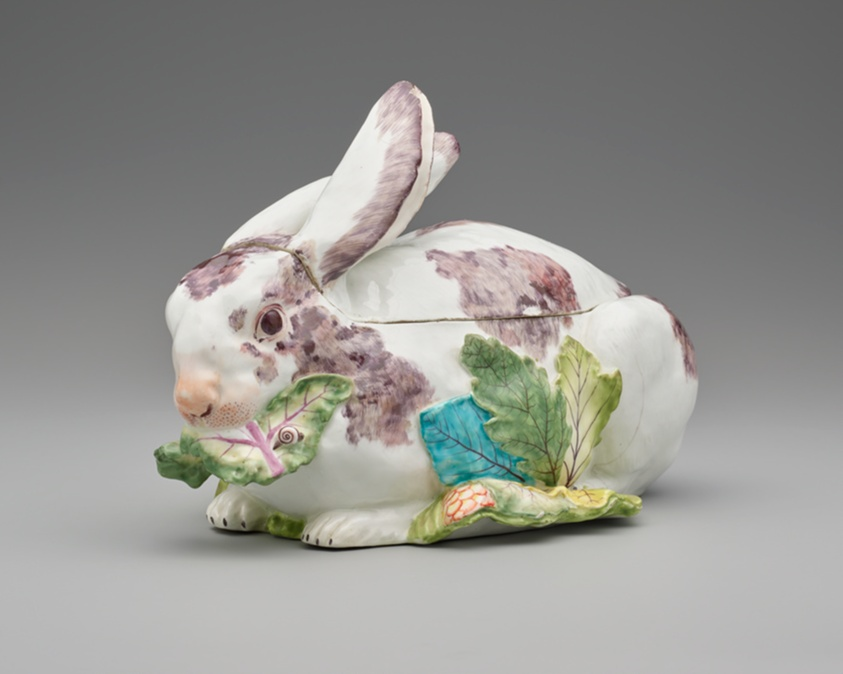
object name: Ceramics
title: Tureen in the form of a Rabbit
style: Rococo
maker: Chelsea Porcelain Manufactory; English, c. 1745–1784; London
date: 1755–56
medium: Soft-paste porcelain and polychrome enamels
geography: Chelsea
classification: tableware; porcelain; european decorative arts; ceramics